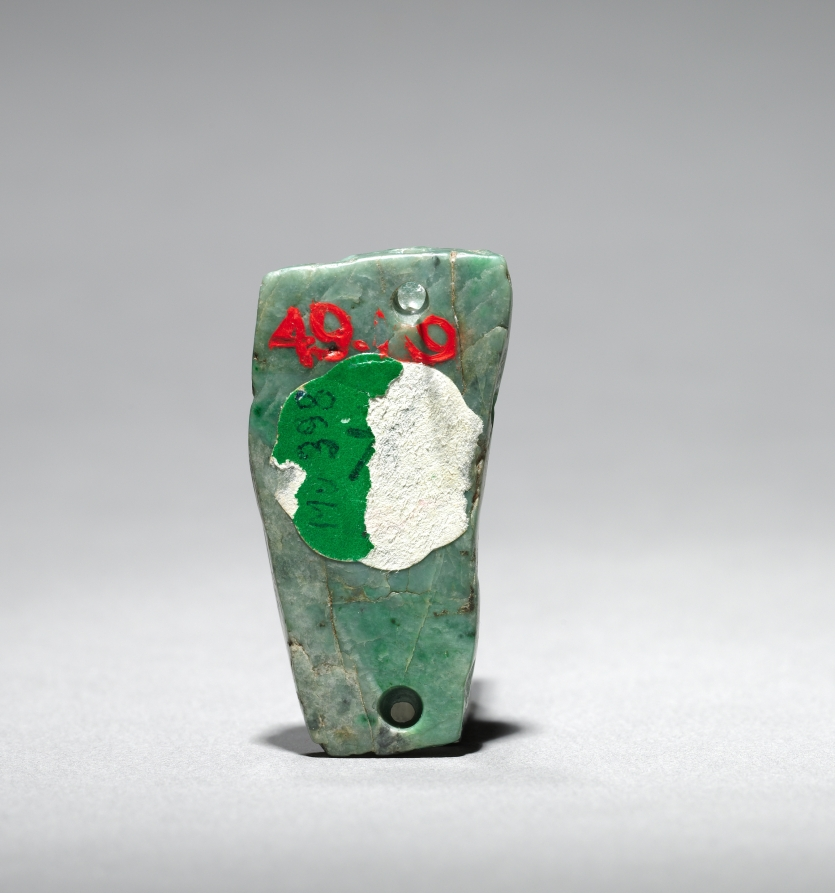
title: Ornament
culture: Mexico or Central America, Maya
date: 250–900 CE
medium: greenstone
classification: Sculpture